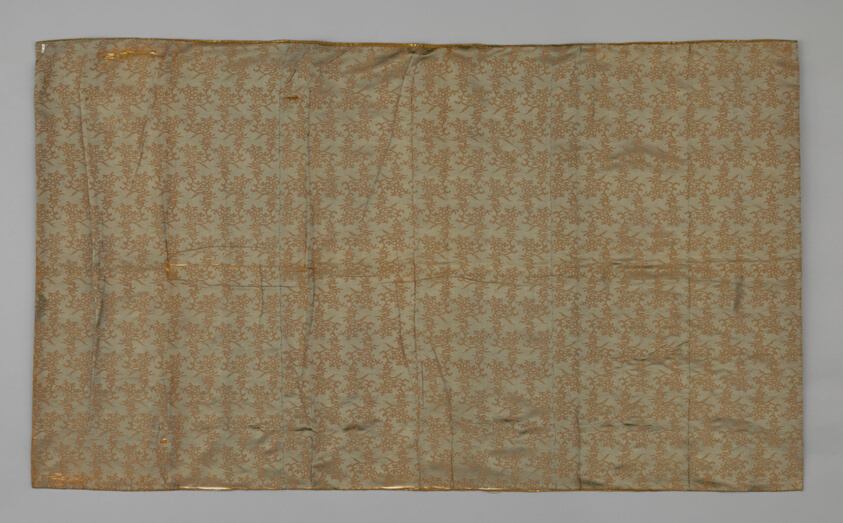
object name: Textile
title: Kesa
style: late edo, edo (japanese period)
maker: Japan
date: late Edo period (1789–1868), mid–19th century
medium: Silk and gold-leaf-over-lacquered-paper strips, warp-float faced 4:1 satin weave with supplementary patterning wefts bound in weft-float faced 1:2 'Z' twill interlacings; patches: silk and gold-leaf-over-lacquered-paper strips, warp-float faced 2:1 'Z' twill weave with weft-float faced 1:2 'Z' twill interlacings of secondary binding warps and supplementary patterning wefts; lined with silk, 4:1 satin damask weave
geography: Japan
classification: textile; liturgical - buddhist; costume; weaving